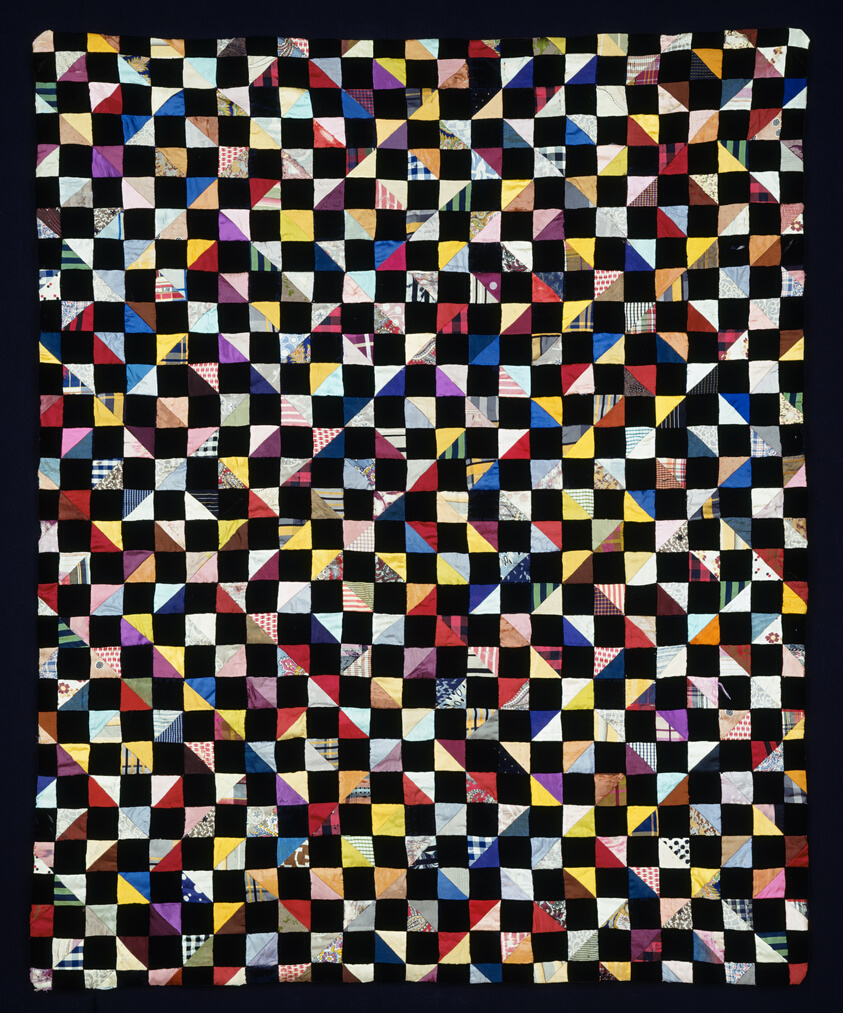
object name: Textile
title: Bedcover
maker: United States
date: c 1900/10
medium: Silk, velvet, plain twill, damask, also warp-faced plain weave; patterns in warp dyeing, printing, brocading, and extra pattern wefts; wadding and printed warp-faced tabby weave silk lining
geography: United States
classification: needlework - quilt; textile